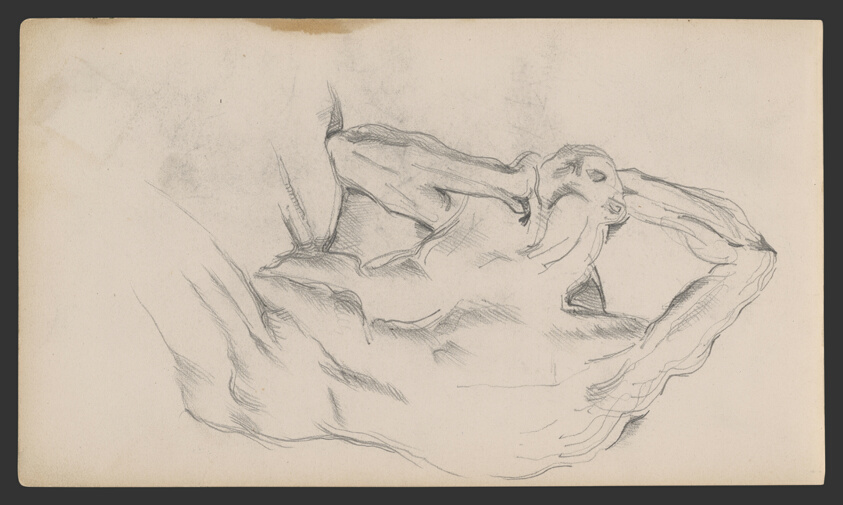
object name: Drawing and Watercolor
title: Sketchbook No. 2 (L'Estaque)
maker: Paul Cézanne; French, 1839-1906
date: 1875–86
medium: Graphite and pen and ink drawings on paper, bound into a book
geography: France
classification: sketchbook; graphite; prints and drawing; paper